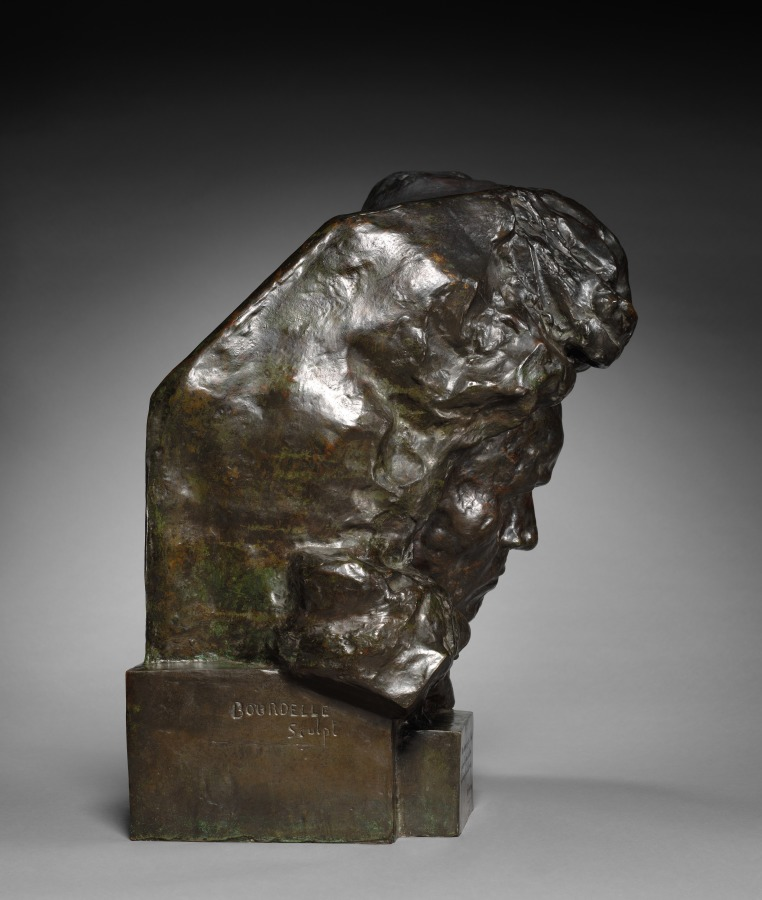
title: Head of Beethoven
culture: France, 19th century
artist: Emile Antoine Bourdelle (French, 1861–1929)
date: 1891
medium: bronze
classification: Sculpture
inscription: Signed left side: "Bourdelle / Sculpt."; inscribed right side: "FONRIENATLE DES BRONZES / J PETERMANN: ST GILLES BRUXELLES"; inscribed on front: "Mon domaine c'est l'air / quand le vent, se leve / mon âme tourbillonne / Beethoven"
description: A pioneer of modern sculpture, Antoine Bourdelle studied at the École des Beaux-Arts in Paris and worked as an assistant to Augustin Rodin, who greatly admired the younger artist’s work. In 1888 Bourdelle produced the first of a series of sculptural portraits of Ludwig van Beethoven, in which the artist orchestrated powerful billowing shapes to convey the creative spirit or genius of the composer. The artist inscribed a quote from Beethoven in the lower left: “My domain is the air; when the wind rises my soul swirls.”